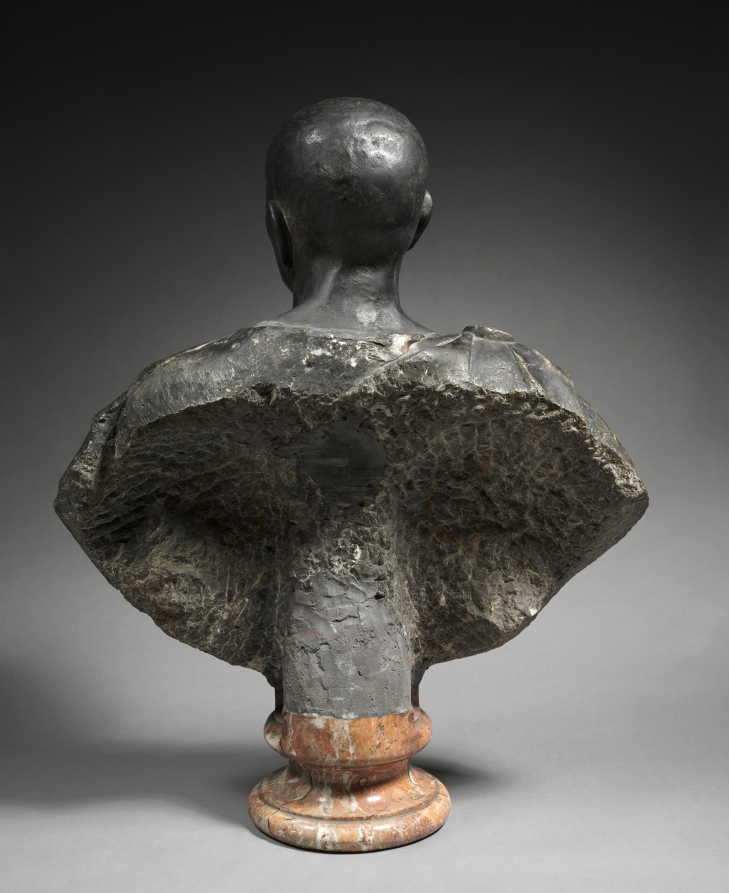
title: Bust of the Ludovisi Cicero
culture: Italy, 17th century or later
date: 1600s or later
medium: marble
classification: Sculpture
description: This work is a variant on the so-called Ludovisi Cicero, a bust in the Uffizi, Florence, that was long-believed to represent the famous Roman orator, but in fact appears to represent an unknown intellectual from the late Roman Republic or early Empire. This interpretation may date as late as the 20th century, and may have been assembled from separate parts.